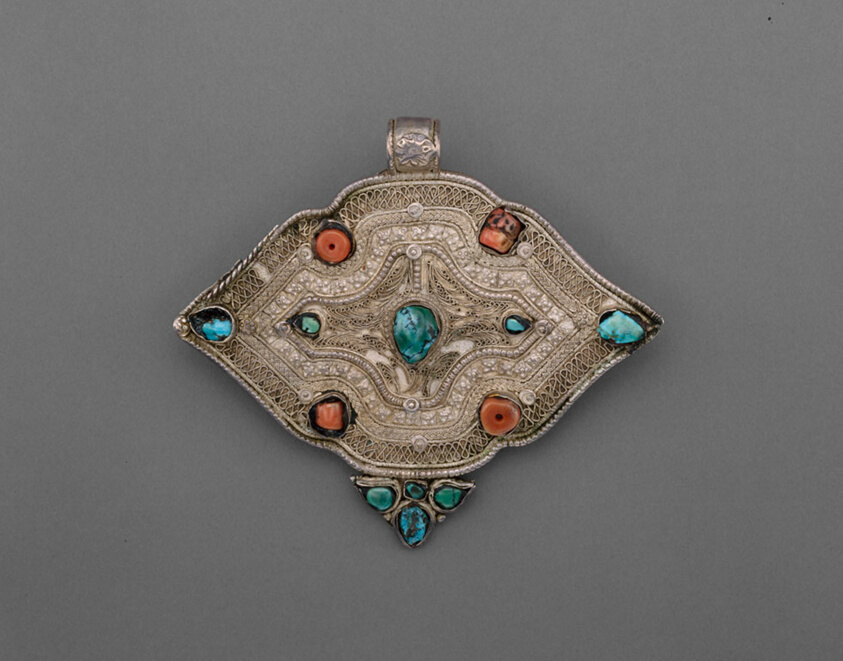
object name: Costume and Accessories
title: Silver Clasp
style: Himalayan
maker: Tibet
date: 18th century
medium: Silver, coral, turquoise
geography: Tibet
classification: jewelry; asian art; costume